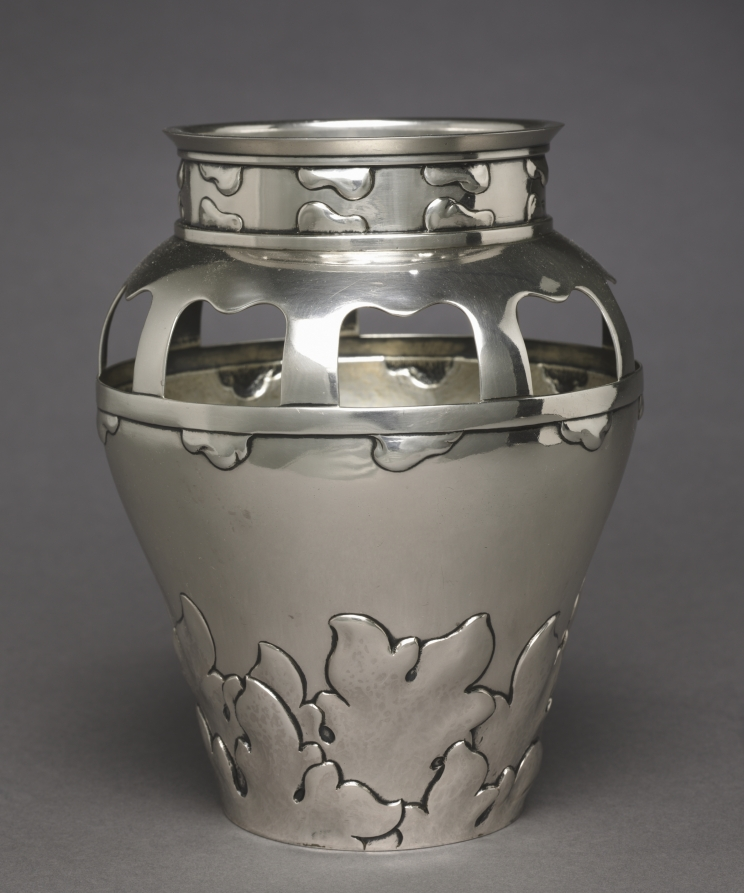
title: Vase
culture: Denmark, Copenhagen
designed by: Thorvald Bindesbøll (Danish, 1846–1908)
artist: firm of Anton Michelsen (Danish)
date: 1900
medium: silver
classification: Silver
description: Bindesboll trained as an architect but is best known as a designer of silver and ceramics. His earliest silver designs were executed by the Copenhagen firm of Michelsen. An artist of considerable originality, Bindesboll was a major figure in the history of modern European design whose work, unfortunately, remains little known outside his native Denmark.